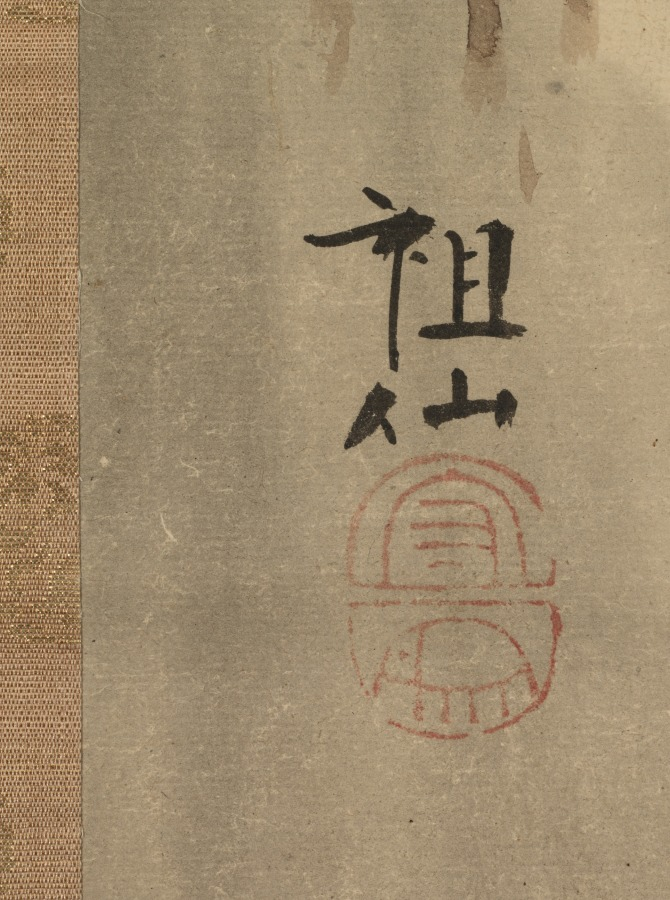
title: Monkey Hanging on to a Branch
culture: Japan, Edo period (1615–1868)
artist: Mori Sosen (Japanese, 1747–1821)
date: 1780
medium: hanging scroll; color on paper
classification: Painting